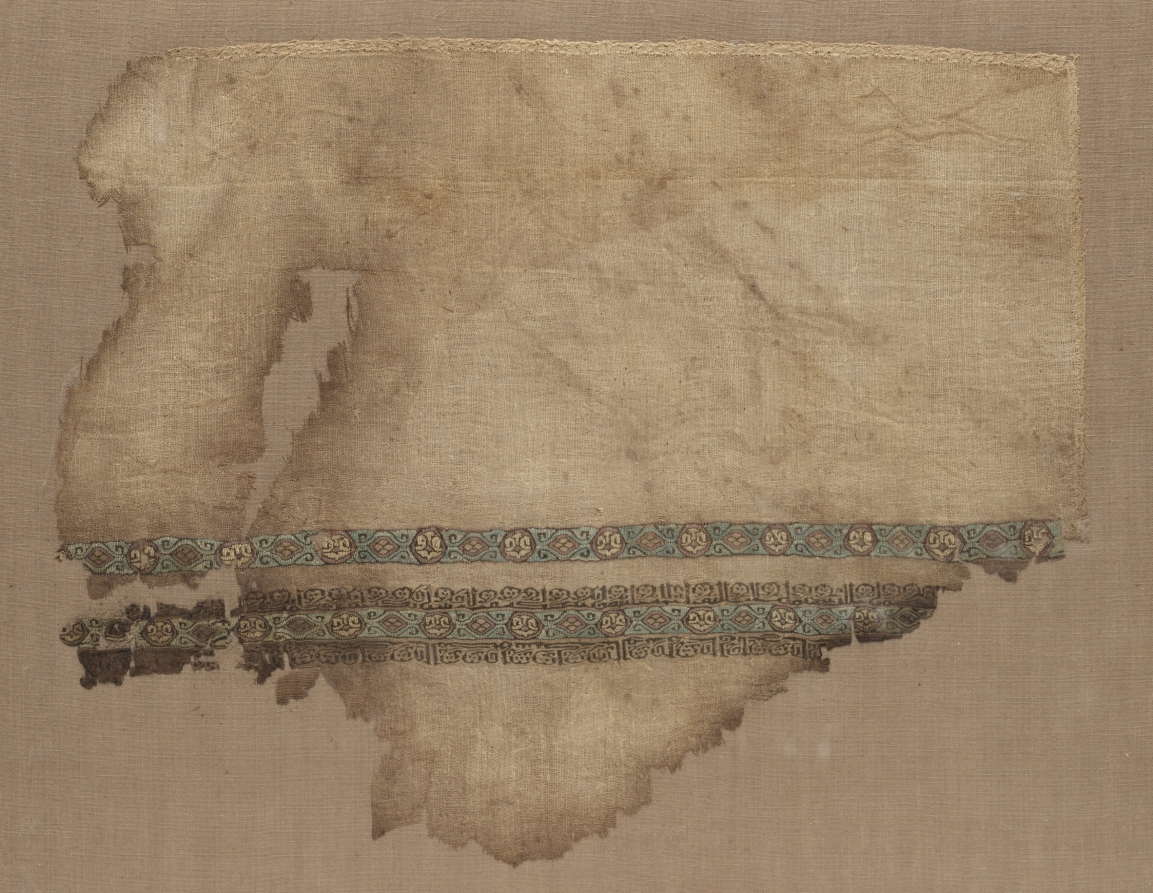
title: Fragment of a Tiraz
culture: Egypt, Fatimid period, Caliphate of al-Mustansir, 1000s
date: 1050–58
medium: tabby ground with inwoven tapestry ornament; linen and silk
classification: Textile